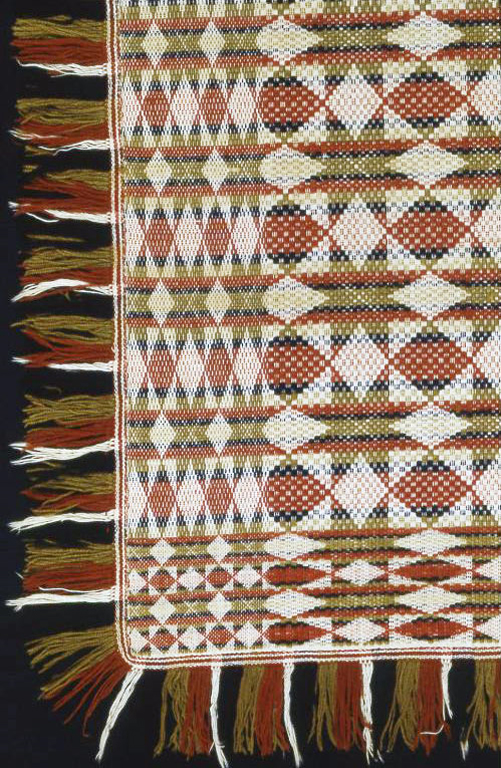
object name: Textile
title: Coverlet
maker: United States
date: 1820s/30s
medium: Cotton and wool, plain weave with supplementary patterning wefts (overshot); edged with plain weave with extended ground weft fringe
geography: United States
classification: weaving - coverlet; coverlet; textile; weaving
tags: geometric motif, coverlet, diamond shapes, stars